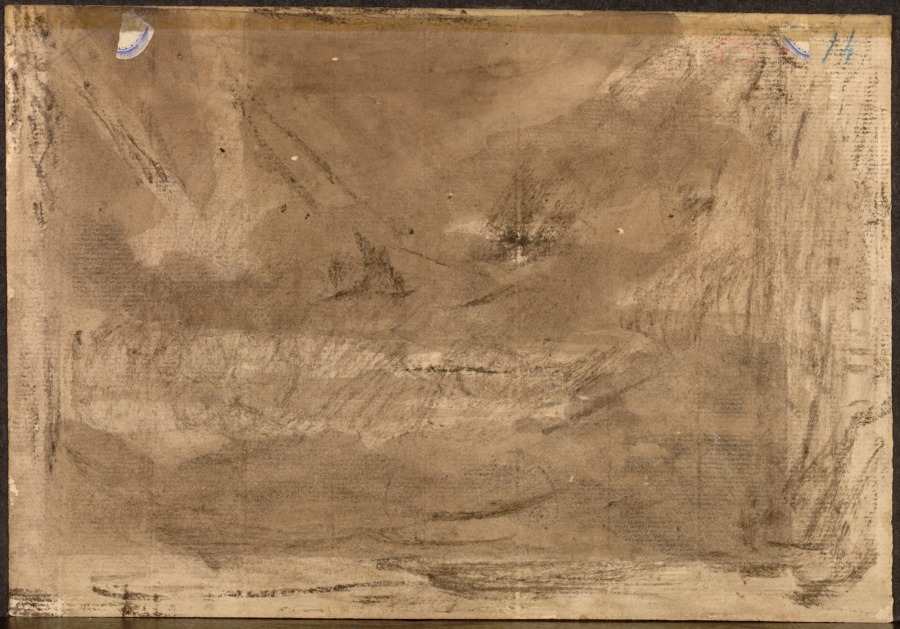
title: Compositional Study? (possibly for "Poussin’s Deluge") (verso)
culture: France, 19th century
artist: Théodore Géricault (French, 1791–1824)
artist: after Nicolas Poussin (French, 1594–1665)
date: c. 1816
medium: brown wash and black crayon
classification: Drawing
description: Géricault's drawing of a man clutching the mane of a horse as they struggle together to stay afloat is a direct copy of a detail from one of Nicolas Poussin's (1594-1665) most celebrated paintings, The Deluge, or Winter (see photo). Small in scale but monumental in feeling, the sheet exemplifies the artist's "antique manner" of drawing, which he began to develop around 1815. This style, with its heavy contour lines and broad washes, developed in tandem with Géricault's renewed interest in copying works of art from the past, such as prints after ancient sculpture and works by Raphael (1483-1520), Michelangelo (1475-1564), and Poussin.